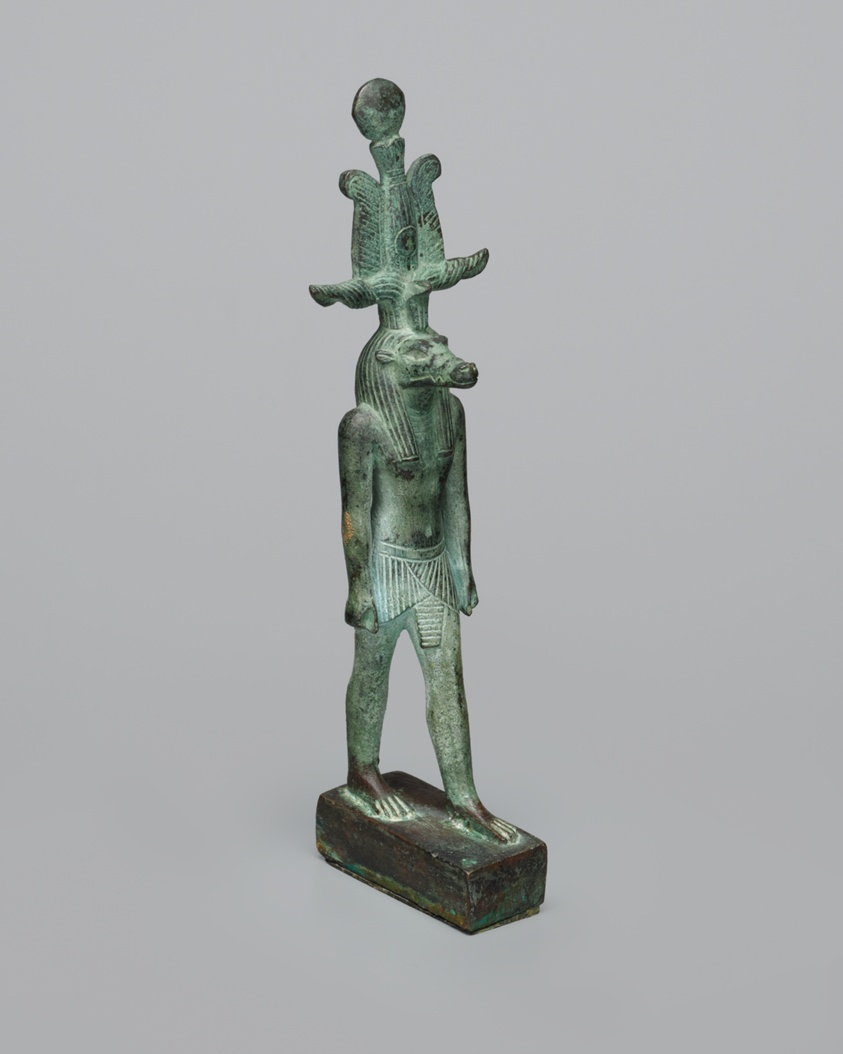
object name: Sculpture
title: Statuette of Sobek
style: late period (egyptian), ancient, egyptian, thirtieth dynasty, twenty-eighth dynasty, twenty-ninth dynasty, twenty-seventh dynasty, twenty-sixth dynasty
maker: Egyptian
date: Late Period, Dynasty 26–30, 664–332 BCE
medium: Copper alloy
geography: Egypt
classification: statuette; bronze; metal; sculpture; ancient art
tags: gods (deities), crowns, crocodiles